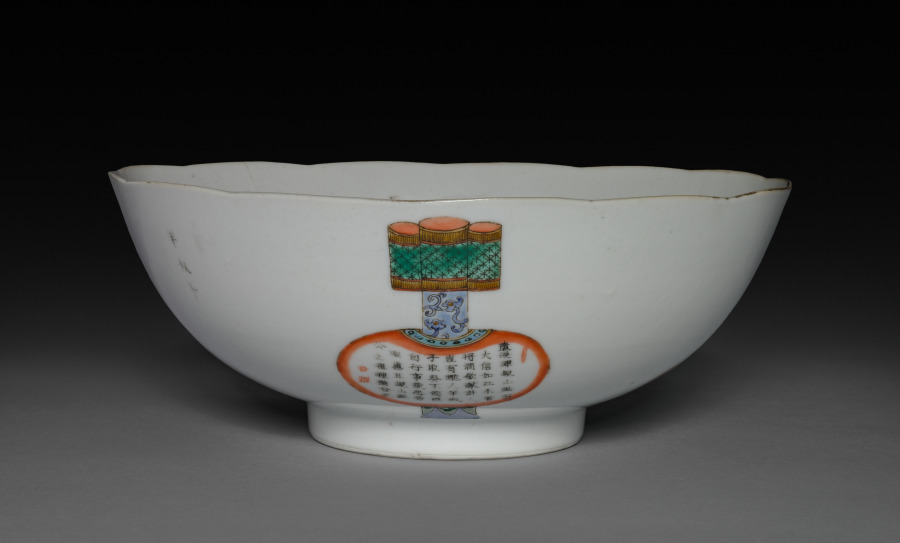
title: Bowl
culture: China, Qing dynasty (1644-1911)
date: 1821–1850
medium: porcelain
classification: Ceramic